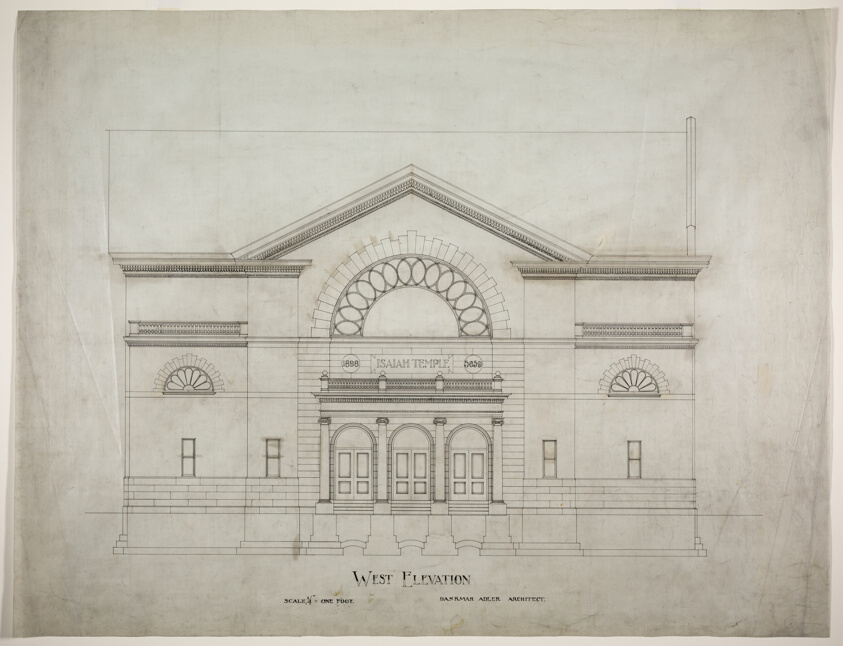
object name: Architectural Drawing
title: Isaiah Temple, Chicago, Illinois, Alternate West Elevation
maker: Dankmar Adler (American, 1844-1900)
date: 1898/99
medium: Black and brown ink on linen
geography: Chicago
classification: architectural drawing